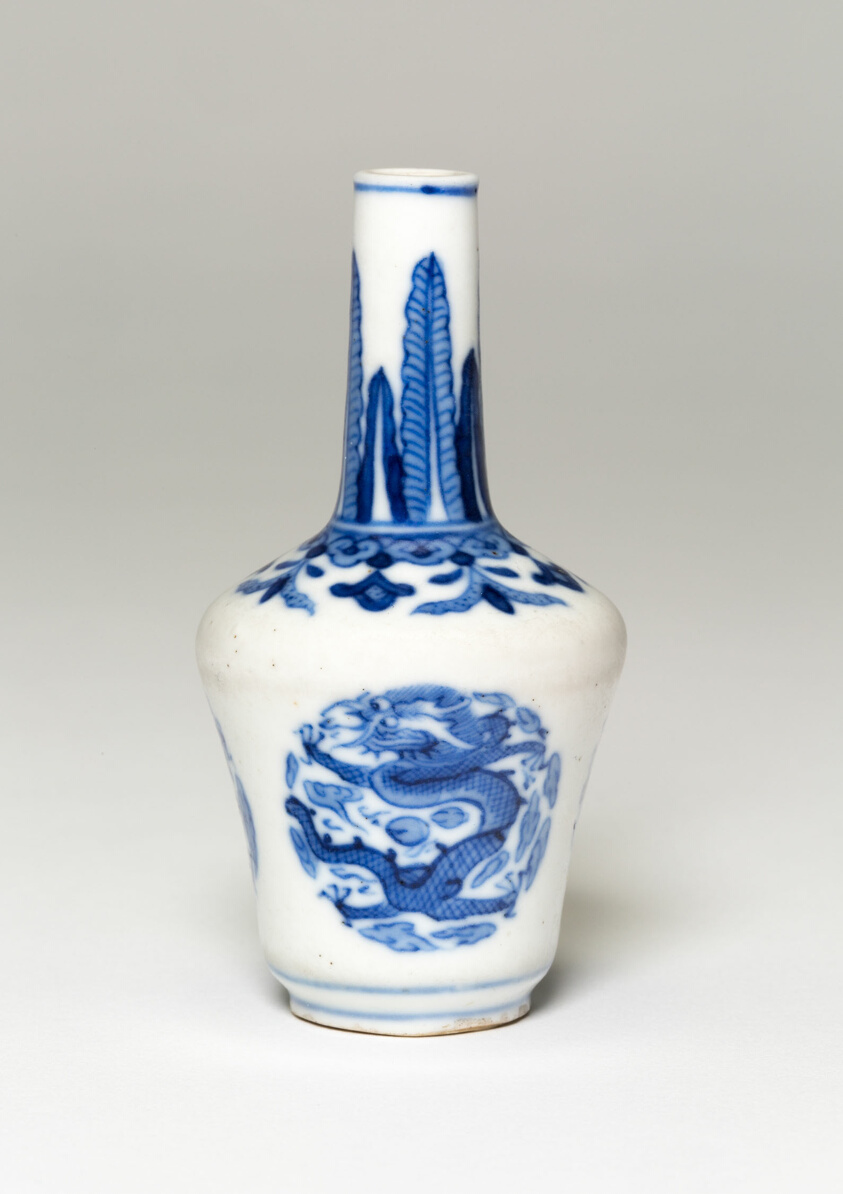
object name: Vessel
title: Bottle-Shaped Vase with Dragons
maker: China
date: Qing dynasty (1644–1911), Yongzheng reign mark and period (1722–1735)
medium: Stoneware painted in underglaze blue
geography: China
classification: ceramics; asian art